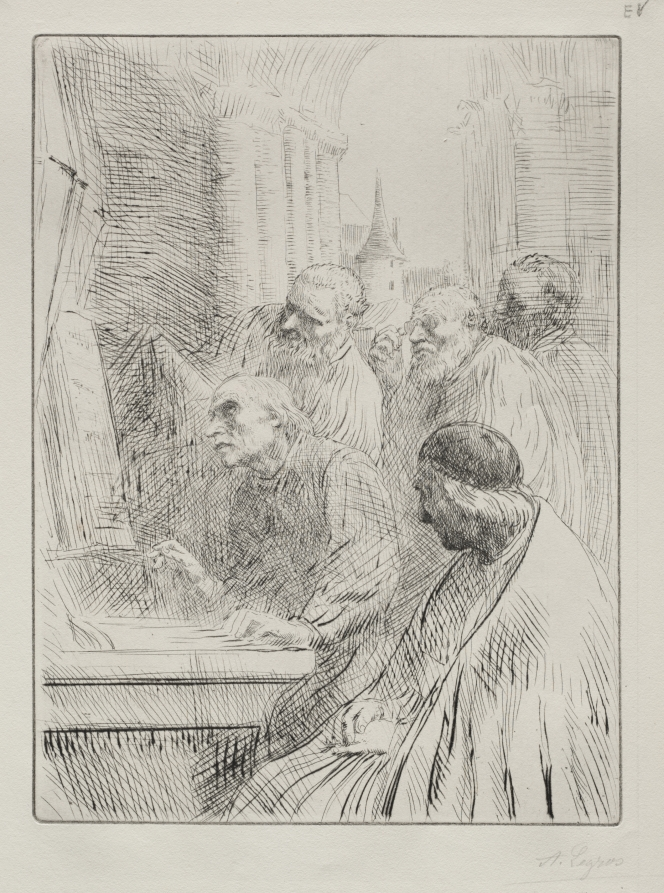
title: The Monks in Church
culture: France, 19th-20th century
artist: Alphonse Legros (French, 1837–1911)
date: c. 1857–1911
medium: etching and drypoint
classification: Print